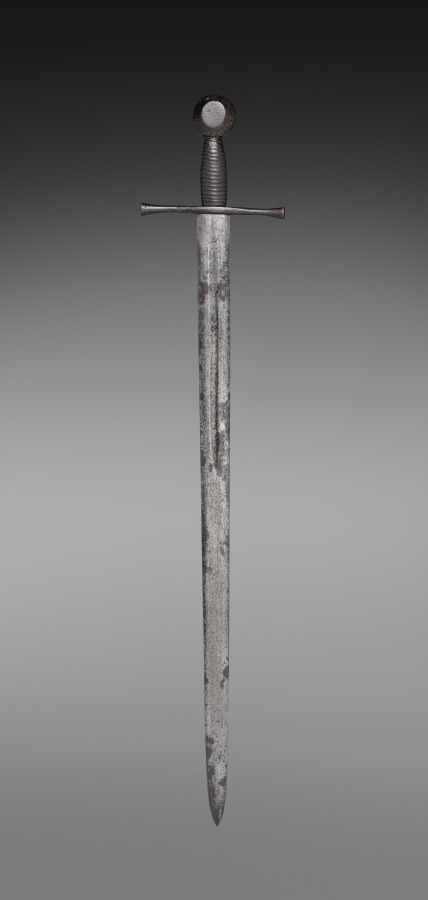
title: Sword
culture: Germany (?)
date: 1400s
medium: steel; wood and leather grip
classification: Arms and Armor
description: During medieval times, everyday objects carried deep spiritual meanings. The knight's sword was perceived as the noblest of weapons because its shape symbolized the cross on which Christ died.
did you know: The unornamented surfaces and signs of use on this sword and those similar to it lead us to believe that they were used in battle. Despite their utilitarian purpose, the blacksmith added details to the handles and hilts to make them visually appealing.